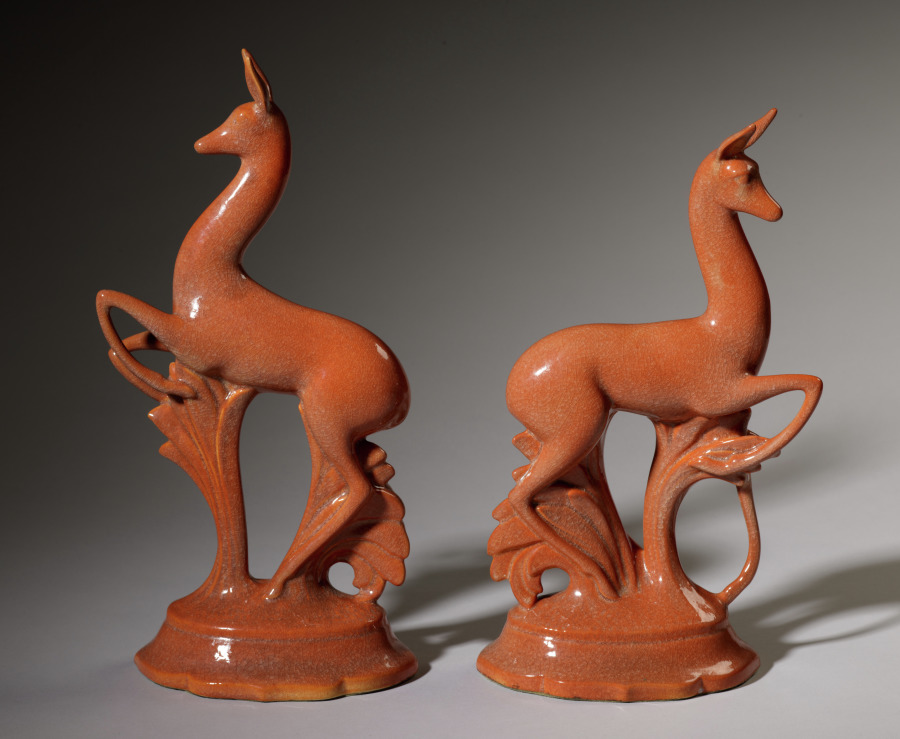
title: Two Fawns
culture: America, Ohio, Cleveland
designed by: Waylande Gregory (American, 1905–1971)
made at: Cowan Pottery Studio (America, Ohio, Rocky River, 1920–1931)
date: 1929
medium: earthenware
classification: Ceramic